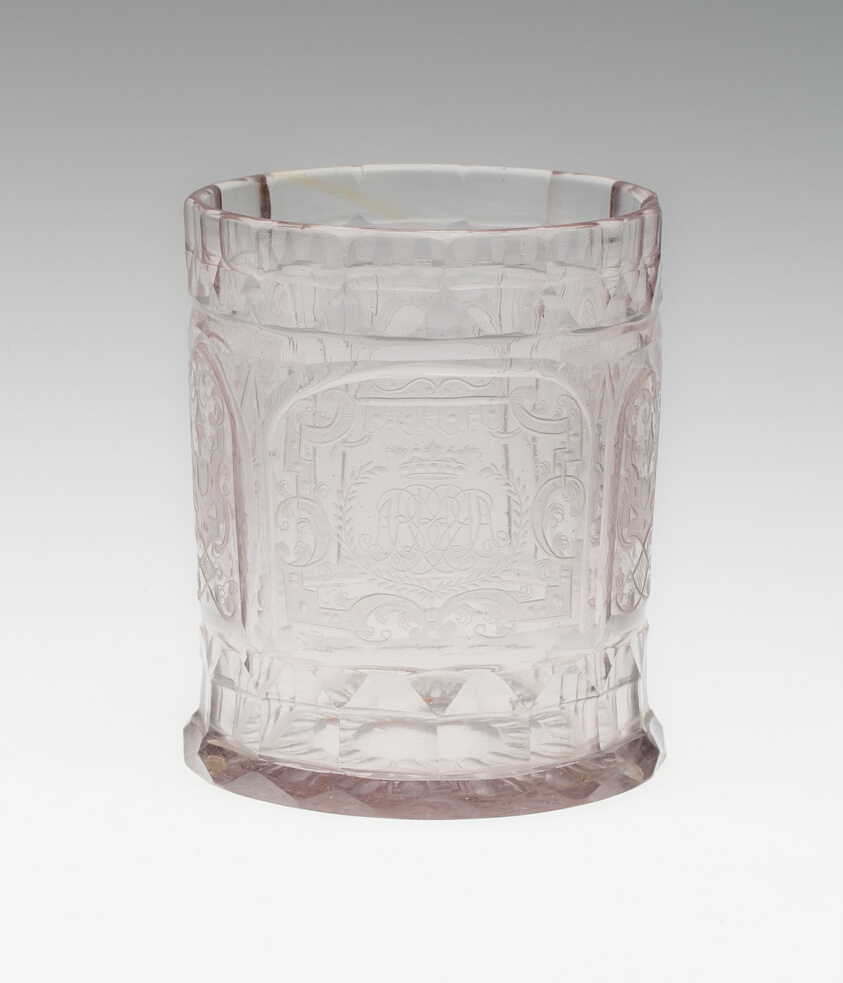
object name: Glass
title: Beaker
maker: Bohemia, Czech Republic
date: c. 1725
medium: Glass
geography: Bohemia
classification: glass; european decorative arts